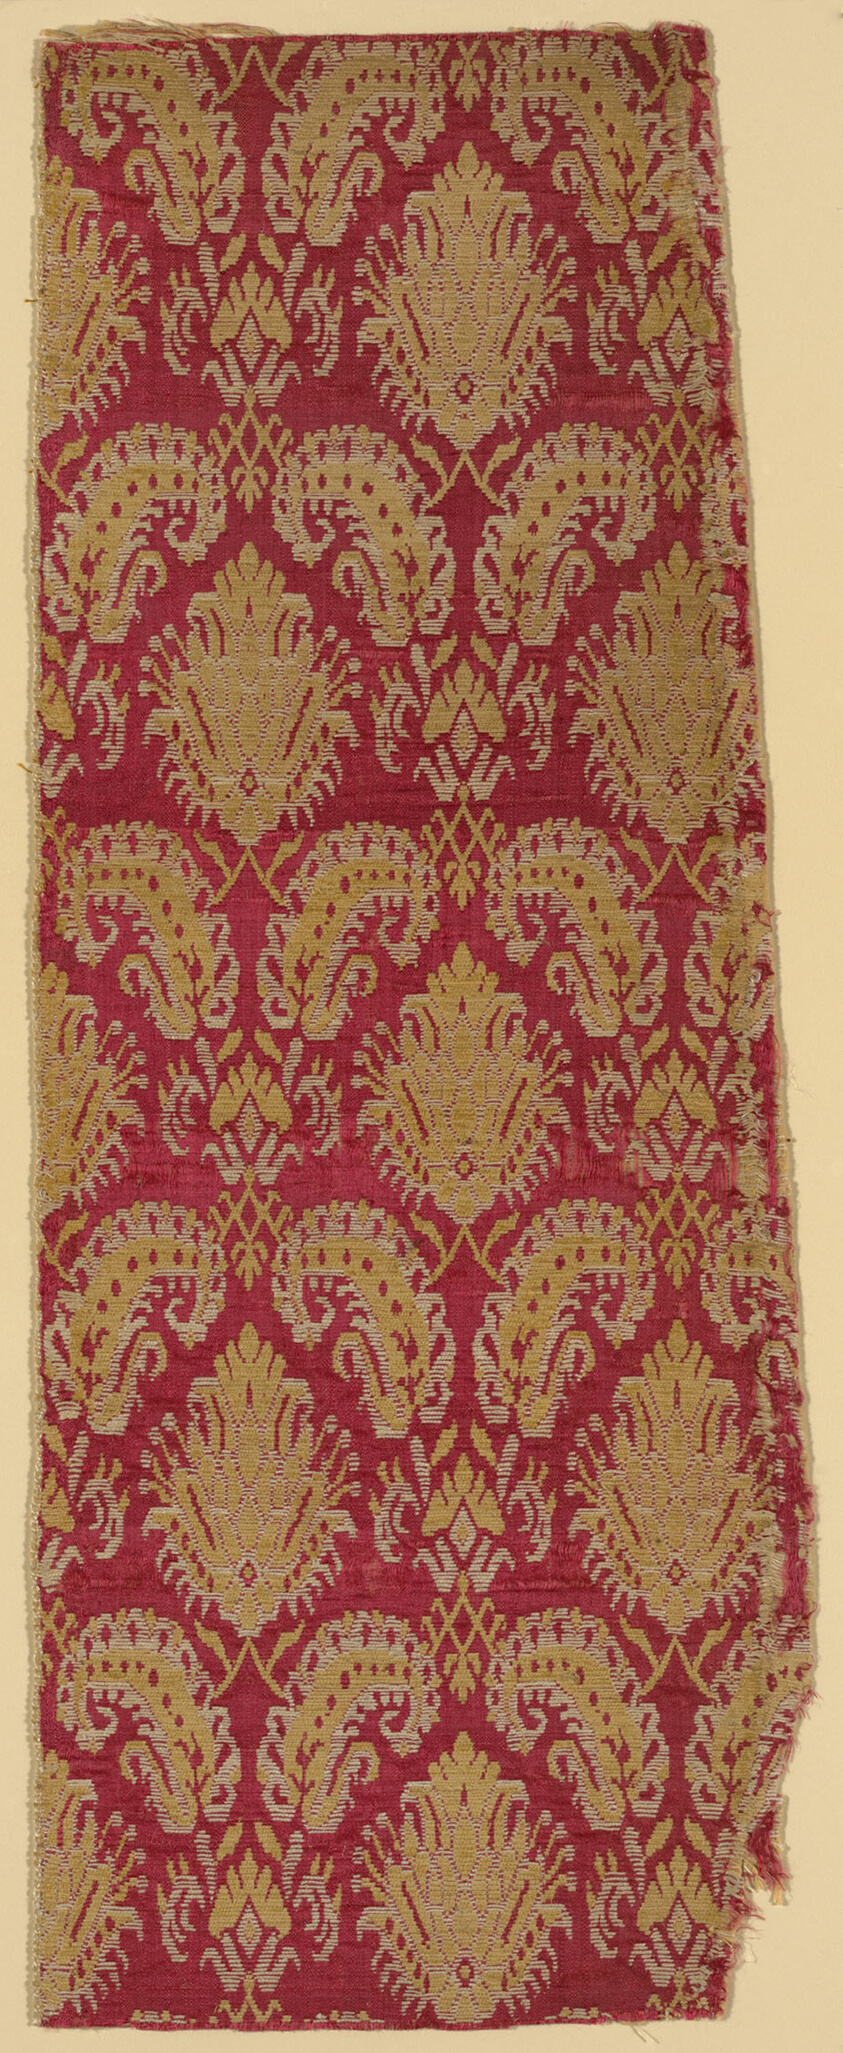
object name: Textile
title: Fragment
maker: Europe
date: 17th century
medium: Silk, linen, and cotton, plain weave, tied and free double cloth with self-patterning ground wefts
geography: Europe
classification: textile; weaving